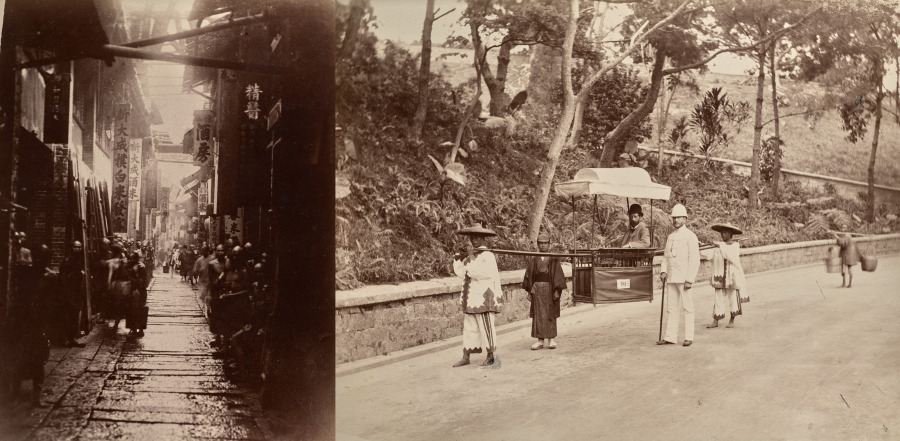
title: Commercial Street, Canton (recto); Untitled (man being carried in sedan chair, verso)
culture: England, 19th century; China, 19th century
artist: Lai Fong (Afong Studio) (Chinese, c. 1839–1890)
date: c. 1860s & c. 1880s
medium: Albumen print and gelatin silver print mounted back to back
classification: Photograph